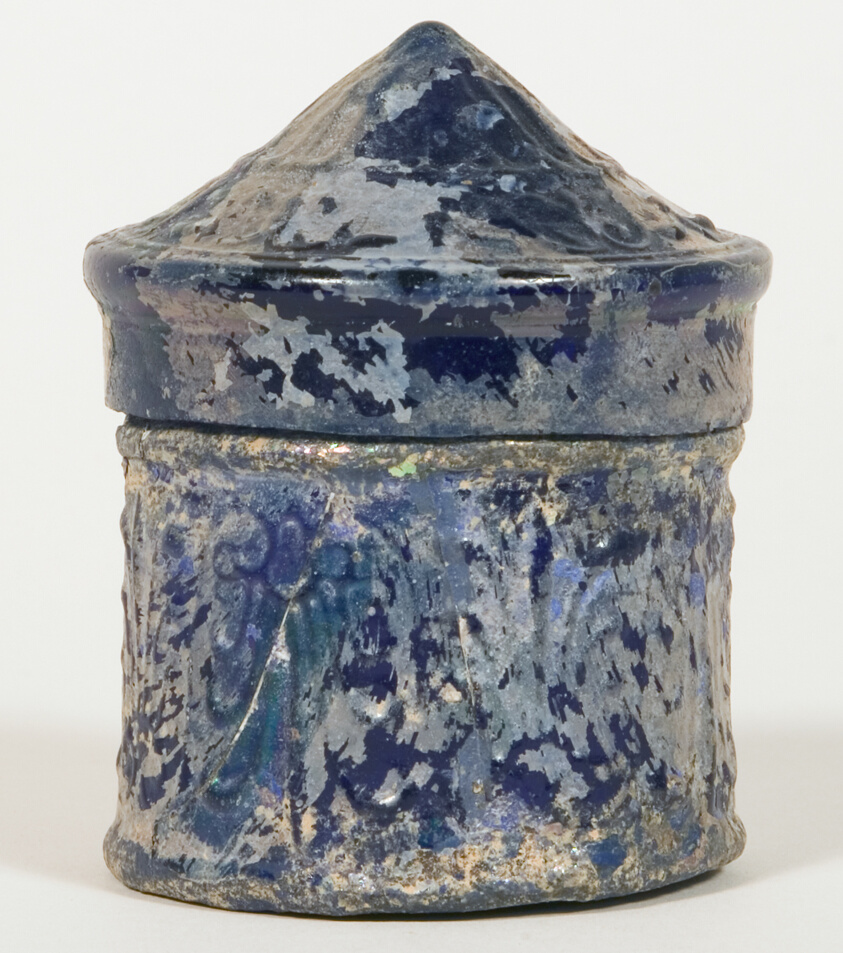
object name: Vessel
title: Pyxis (Container for Personal Objects)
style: roman (ancient, style or period), ancient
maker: Roman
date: 1st century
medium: Glass, mold-blown technique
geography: Roman Empire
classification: glass; vessel; ancient art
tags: containers